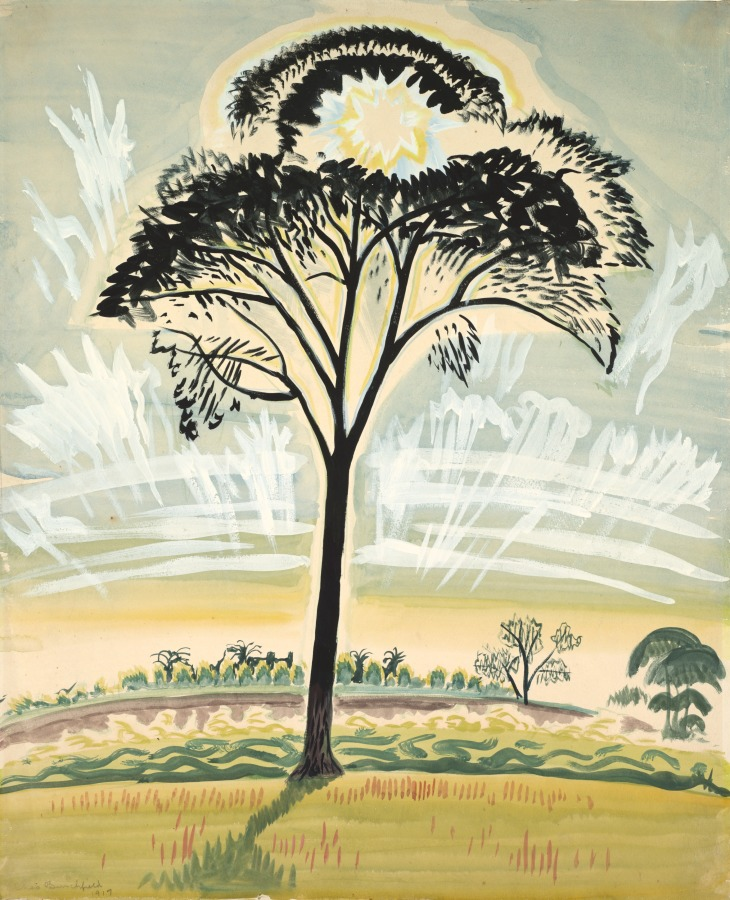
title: The Sun Through the Trees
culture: America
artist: Charles Burchfield (American, 1893–1967)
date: June 30, 1917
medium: Watercolor and opaque watercolor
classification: Drawing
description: While sketching in the Ohio countryside in 1916, Burchfield began to represent the sun as a dramatic orb. This sheet is part of a group in which the artist suggested stained glass windows using trees and the sun. Here, branches reach toward the sun to form a dark, halo-like frame filled by sunlight that diffuses into an array of color. By combining landscape with religious iconography, Burchfield suggested the divine influence he saw in nature.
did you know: This work is an early example in which Burchfield began to paint directly and expressively with watercolor rather than carefully sketching out his composition in advance.